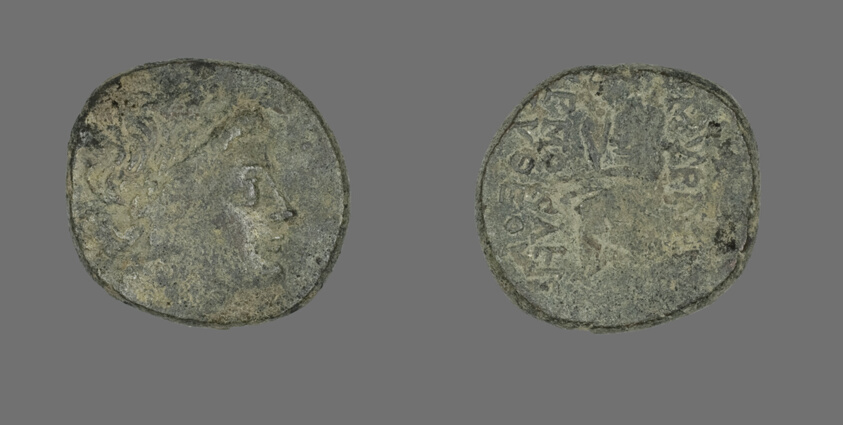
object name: Coin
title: Coin Depicting the God Apollo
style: greek, ancient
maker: Greek; Smyrna, Ionia (now Izmir, Turkey)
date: 2nd-1st century BCE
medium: Bronze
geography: Smyrna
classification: coin; ancient art